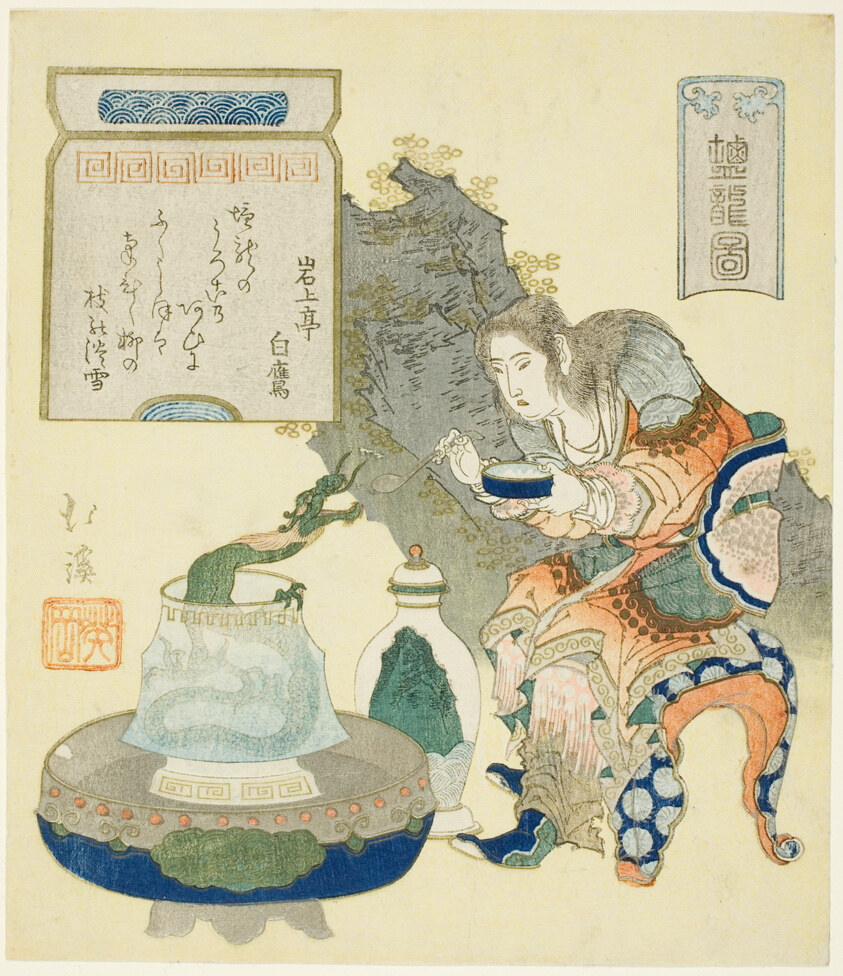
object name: Print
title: The Salt Dragon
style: Japanese (culture or style)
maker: Totoya Hokkei (Japanese, 1780–1850)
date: 1832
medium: Color woodblock print with metallic pigments; surimono shikishiban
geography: Japan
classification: woodblock print; print; asian art